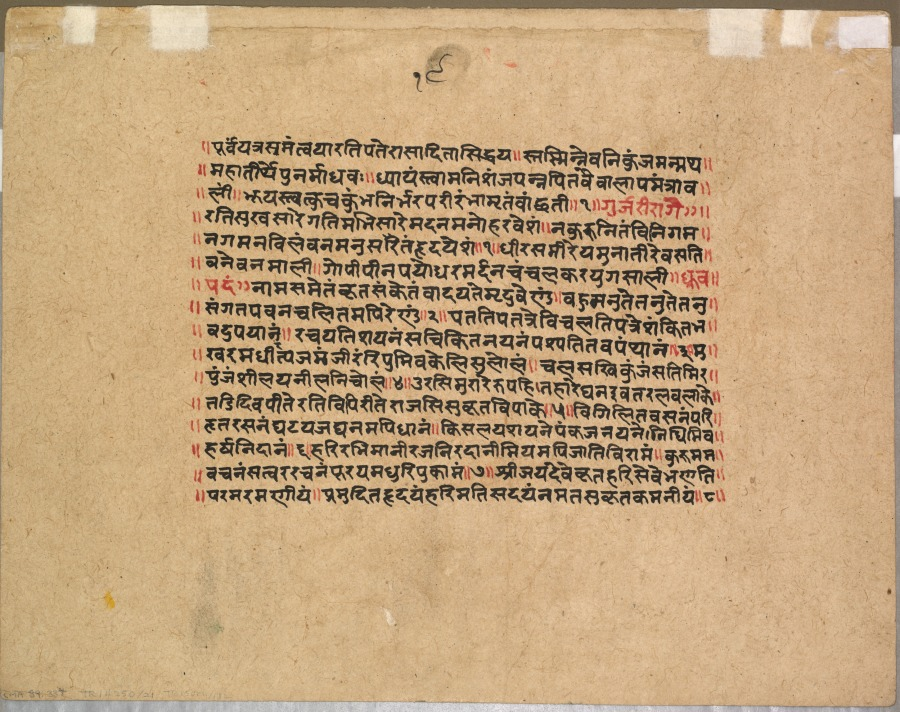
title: Sakhi persuades Radha to meet Krishna, from a Gita Govinda (Song of the Cowherd) of Jayadeva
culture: Northern India, Pahari kingdoms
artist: attributed to Purkhu (Indian, 1750–1860)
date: c. 1820–25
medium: gum tempera and gold on paper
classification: Painting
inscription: translation: "Yea Lady! in the self-same spot he waits Where with thy kiss thou taught'st him utmost love, And drew him, as none else draws, with thy look; And all day long, and all night long, his cry Is 'Radha, Radha' like a spell said o'er And in his heart there lives no wish nor hope Save only this, to slake his spirit's thirst For Radha's love with Radha's lips; and find Peace on the immortal beauty of thy breast. (What follows is the Music Gurjjari and the Mode Ekatali.) Mistress, sweet and bright and holy! Meet him in that place; Change his cheerless melancholy Into joy and grace; If thou hast forgiven, vex not: If thou lovest, go, Watching ever by the river, Krishna listens low: Listens low, and on his reed there Softly sounds thy name, Making even mute things plead there For his hope: 'tis shame That, while winds are welcome to him, If from thee they blow, Mournful ever by the river Krishna waits thee so! When a bird's wing stirs the roses, When a leaf falls dead, Twenty times he recomposes The flower-seat he has spread: Twenty-times, with anxious glances Seeking thee in vain, Sighing ever by the river, Krishna droops again. Loosen from thy foot the bangle, Lest its golden bell, With a tiny tattling jangle, Any false tale tell: If though fearest the moonlight Will thy glad face know, Draw those dark braids lower, Lady! But to Krishna go. Swift and still as lightning's splendour Let thy beauty come. Sudden, gracious, dazzling, tender, To his arms---its home. Swift as Indra's yellow lightning, Shining through the night, Glide to Krishna's lonely bosom, Take him love and light. Grant, at last, love's utmost measure, Giving the whole: Keep back nothing of the treasure Of thy priceless soul: Hold with both hands out unto him Thy chalice, let him drain The nectar of its dearest draught, Till not a wish remain. Only go---the stars are setting, And thy Krishna grieves; Doubt and anger quite forgetting, Hasten through the leaves: Wherefore didst thou lead him heav'nward But for this thing's sake? Comfort him with pity, Radha! Or his heart must break. But while Jayadeva writes This rare tale of deep delights--- Jayadev, whose heart is given Unto Jari, Lord in Heaven--- See that ye too, as ye read, With a glad and humble heed, Bend your brows before His face, That he may have bliss and grace."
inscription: poorva yatra sama tvaya rati patera sadita siddhayas tasminneva nikunja manmatha mahatirthe punar madhava. dhyayas tvam nisha japanna pita vaivalapa mantra vali. bhuyas tvat kucha kumbha nirbhara parirambhamta vanchati(1). gurjari rage. rati sukha sare gatambhisare madana manohara venam. na kuru nitambini gamana vilambanam anusara ta hridayesham (1). dhira samire yamuna tire vasati vane vanamali. gopi pina payodhara mardana chanchal kara yuga sali. nam sametam krita sanketam vadaya tem duveyum. bahumanu te tanu te tanu sangata pavana chalitamapi re end (2). patati patatre vicalati patre shankita-bhavad-upayanam rachayati shayanam sachakita-nayanam pashyati tava panthanam (3). mukharam adhira tyaja manjiram ripum iva keli sulolam chala sakhi kunja satimira-punja shilaya nila nicholam (4). urasi murarer upahita-hare ghana iva tarala balake taòid iva péte rati viparete rajasi sukata-vipake (5). vigalita-vasanam parihata-rasana ghauaya jaghanam apidhanam kisalaya-shayane pankaja-nayane nidhim iva harna-nidhanam (6). harir abhimane rajanir idanem iyam api yati viramam kuru mama vachana satvara-racana puraya madhuripu-kamam (7). shri-jayadeve kata-hari-seve bhaati paramaramaeyam pramuditahadaya harim atisadaya namata sukata kamaneyam (8)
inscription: 19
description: While all the cowherd girls were in love with Krishna, he had a favorite according to texts of the 1200s and later. Her name was Radha, and she and Krishna would meet for secret trysts in the forest, facilitated by her sakhi, or confidante. Krishna is shown twice in this painting. At the right he is in the process of making a bed of leaves for their upcoming encounter, and in the middle, he spies on Radha, wearing orange and gold. The sakhi is encouraging Radha to go and meet Krishna, since he is pining for her.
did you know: According to the text, Krishna softly plays his flute and weaves his beloved Radha's name into the melody.